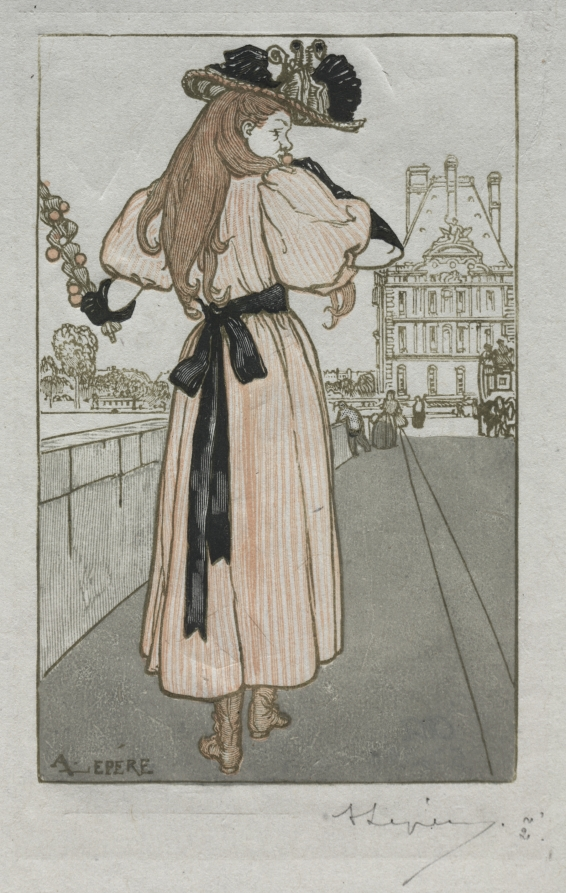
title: Paris Almanac, 1897: Spring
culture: France, late 19th Century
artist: Auguste Louis Lepère (French, 1849–1918)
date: 1897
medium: wood engraving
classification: Print